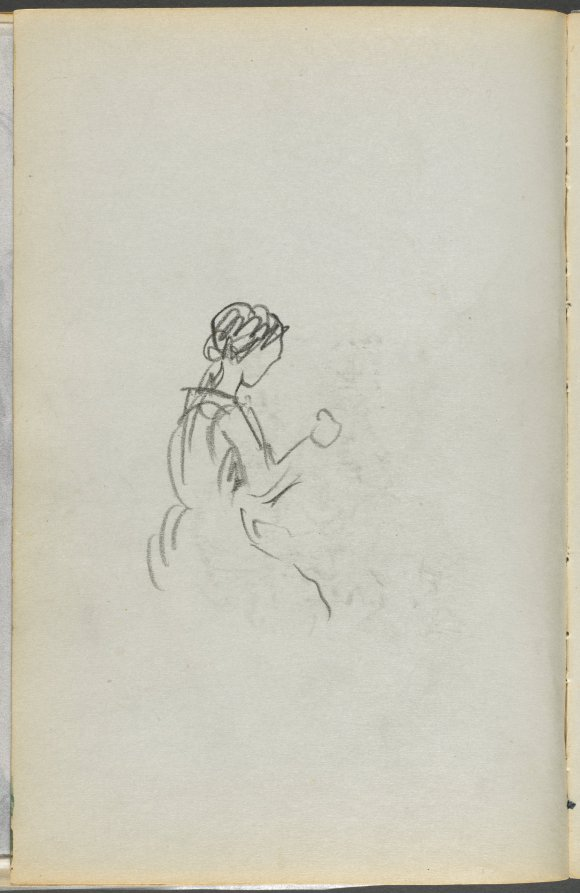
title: Sketchbook, The Dells, N° 127, page 118: Figure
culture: America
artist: Maurice Prendergast (American, born Newfoundland [now Canada], 1858–1924)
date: c. 1919–1921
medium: graphite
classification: Bound Volume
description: This sketchbook contains 59 pages of graphite drawings and 16 watercolors made at various locations on Cape Ann, Massachusetts.